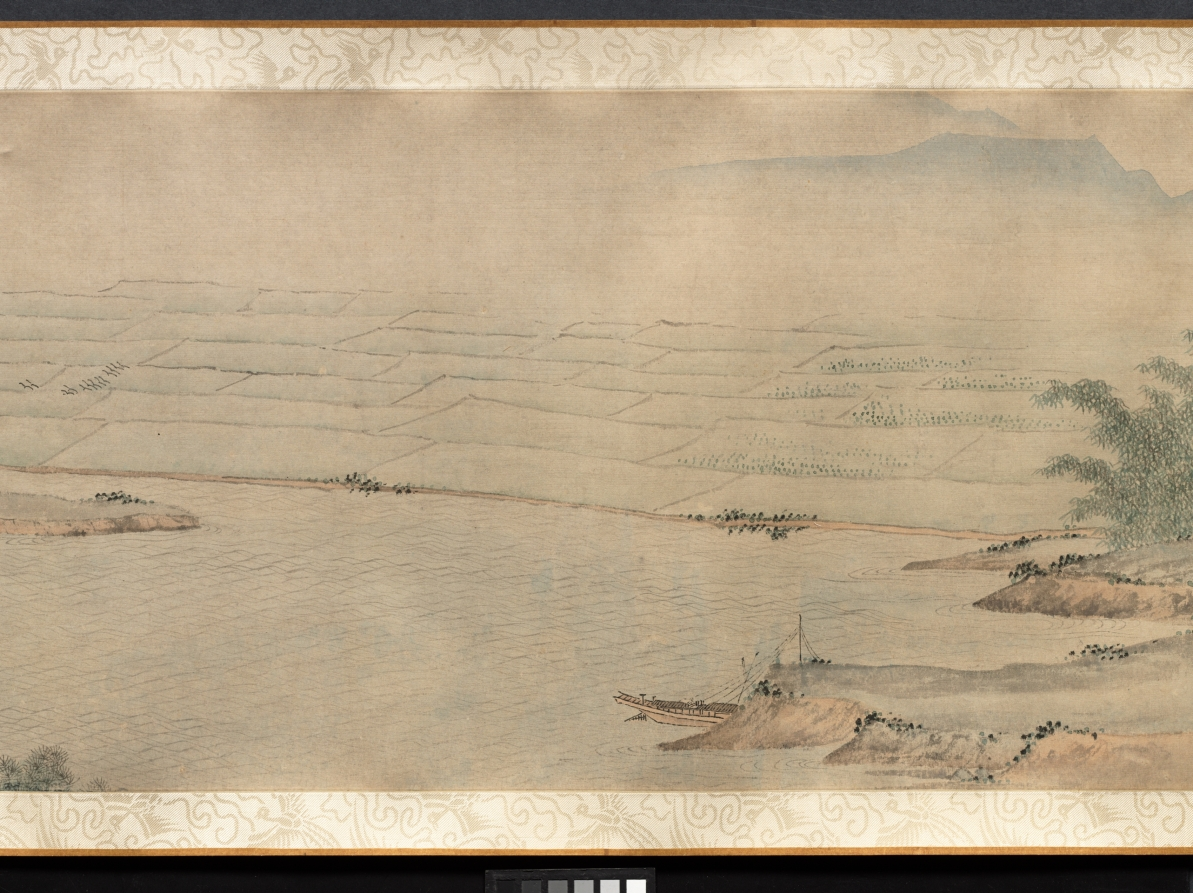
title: Ten Thousand Li of the Yangzi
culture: China, Ming dynasty (1368–1644)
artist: Dai Jin (Chinese, 1388–1462)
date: c. 1400s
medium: Handscroll; ink and color on paper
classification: Painting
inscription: Two colophons at end. Artist's seals: Dai Jin 戴進 and Wenjin 文進.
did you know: Dai Jin is traditionally considered the founder of the Zhe School, a style of landscape painting.